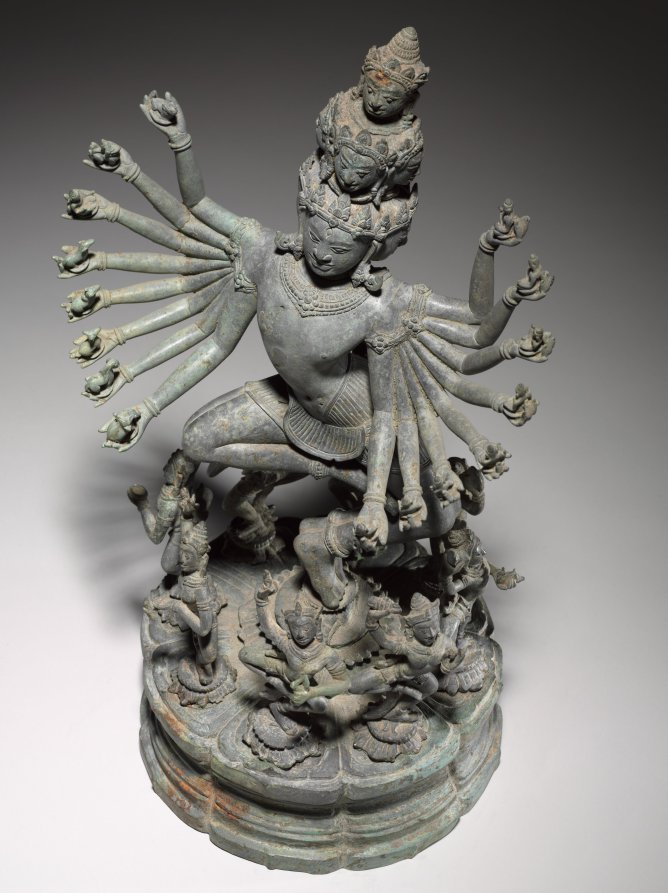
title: Hevajra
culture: Northeastern Thailand, former kingdom of Angkor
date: c. 1200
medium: Bronze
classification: Sculpture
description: Hevajra was an important figure signaling the practice of Buddhist rituals. King Jayavarman VII placed particular emphasis on Hevajra during consecration rituals and set up a colossal stone sculpture of dancing Hevajra at the east gate of his fortified city in the Khmer capital at Angkor. In the Cambodia of Jayavarman VII, tantric Buddhism became public and widespread, practiced together with other more mainstream forms of Buddhism, Hinduism, and ancestor worship. The iconography of Hevajra is described in detail in a text that bears his name, the Hevajra-tantra, first composed in India probably in the 800s. Hevajra has eight heads, sixteen arms, and four legs. His left hands hold images of Indic gods; wealth, death, sun, moon, fire, wind, water, and earth. In his right hands are animals: bull, lion, human, cat, camel, sheep, horse, and elephant. They all sit in skull cups, objects also used in tantric rituals. He dances on a corpse that embodies ignorance and is surrounded by eight yoginis who dance triumphantly in a ring around him. Yoginis functioned as intercessors between human practitioners and enlightened beings. Many bronze images of Hevajra were made during the reign of Jayavarman VII, but few survive in as pristine condition as this example. According to scientific analysis and curatorial reports, this sculpture survived in a clay vessel submerged in water, which accounts for its high tin content and unusual gray patina. Samples from the clay core reveal the presence of the mineral feldspar, a characteristic of clay from the Isaan plateau, on the other side of the mountain range not far from Banteay Chhmar, in present-day Thailand.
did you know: Hevajra, the Tantric Buddhist deity who personifies Enlightenment, dances vigorously to symbolize the human soul's liberation from the snare of existence.